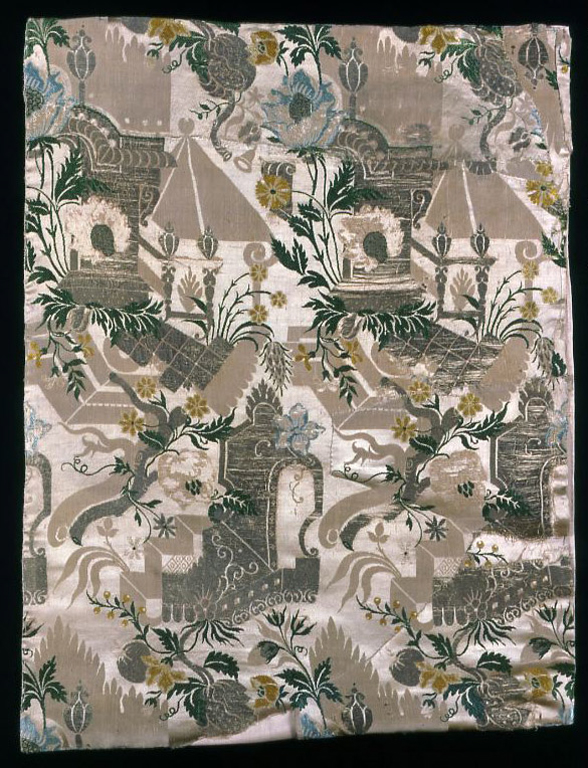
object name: Textile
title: Panel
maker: England or France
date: c. 1707/08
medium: Silk, gilt-metal-strip-wrapped silk, 4:1 satin weave with supplementary brocading wefts and self-patterned by reversing of faces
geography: England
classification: textile; weaving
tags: Floating Gardens